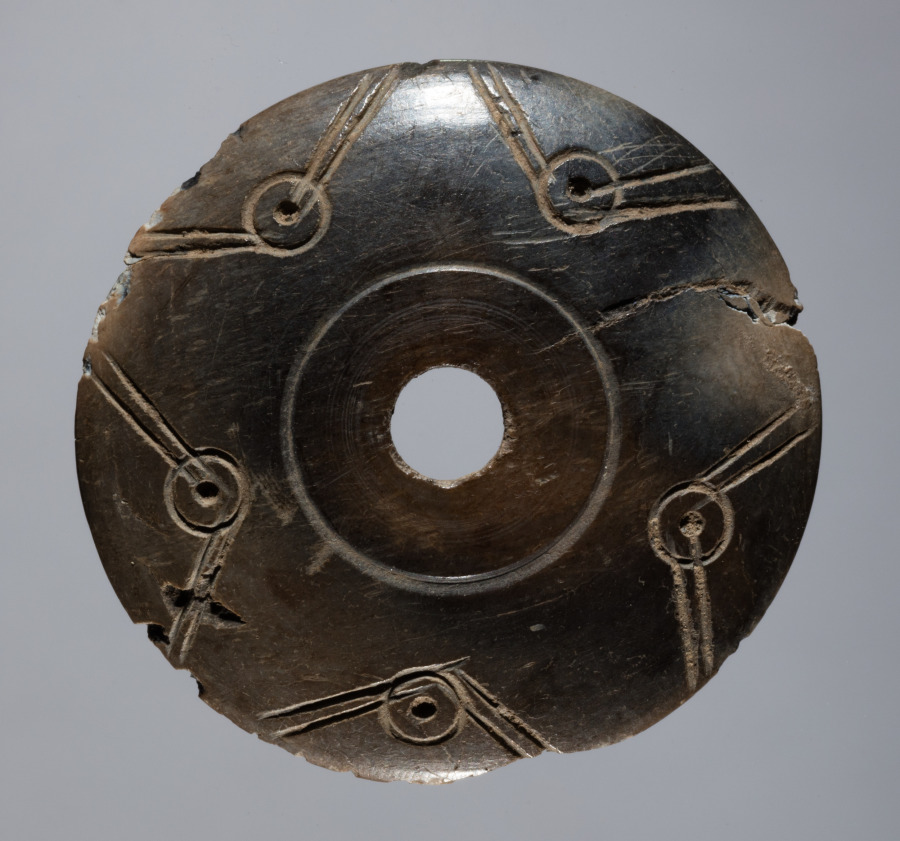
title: Spindle Whorl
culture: Iran, early Islamic period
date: 700s - 900s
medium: bone, incised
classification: Spindle Whorl